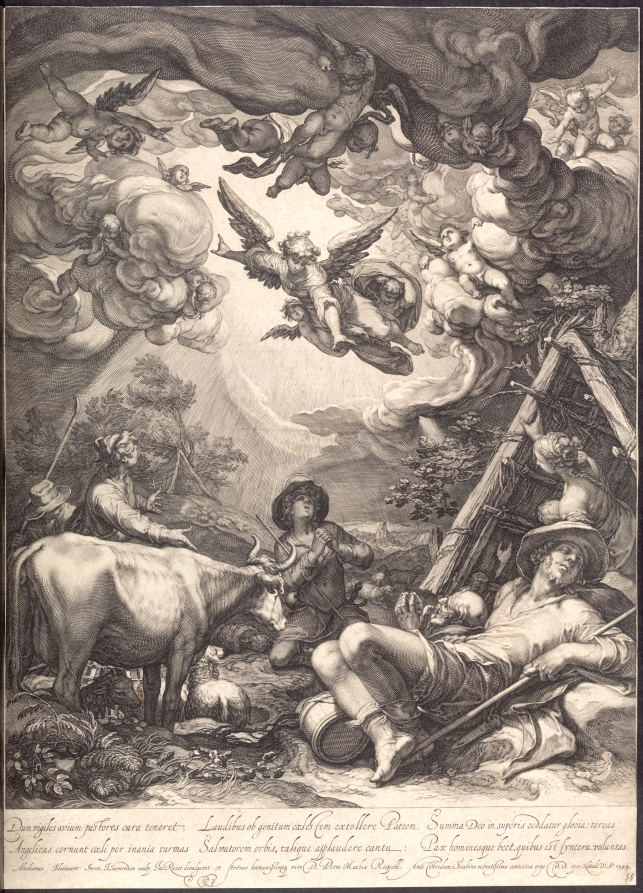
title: The Annunciation to the Shepherds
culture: Netherlands, 16th century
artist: Jan Saenredam (Dutch, 1565–1607)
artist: after Abraham Bloemaert (Dutch, 1566–1651)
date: 1599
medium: engraving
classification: Print